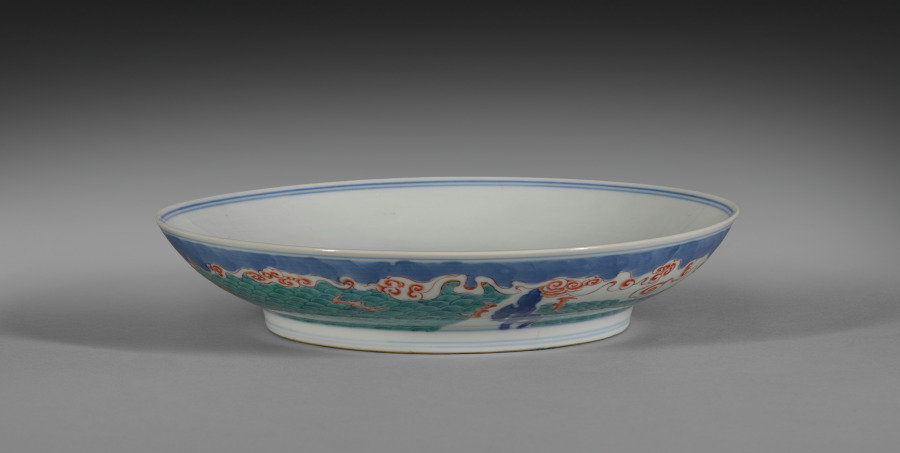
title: Plate with Isle of the Immortals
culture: China, Jiangxi province, Jingdezhen kilns, Qing dynasty (1644-1911), Yongzheng mark and reign (1723-35)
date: 1723–35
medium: porcelain decorated in underglaze cobalt blue and overglaze enamels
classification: Ceramic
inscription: 大清雍正年製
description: This multicolored dish is decorated with the sacred isle, also seen on the exterior of the blue-and-white dish nearby. A pavilion emerges amid rising and falling waves, a symbol of constant transformation and change. Above the waves are mysterious clouds, symbolizing the cosmic vital energy (qi) that animates all things and beings on earth in Daoism. The interior of the dish also shows cranes carrying sticks in their beaks, a motif that symbolizes longevity. Cranes carrying sticks above a pavilion in the sea express the wish “May you live to a ripe old age (haiwu tianchou; 海屋添籌).”